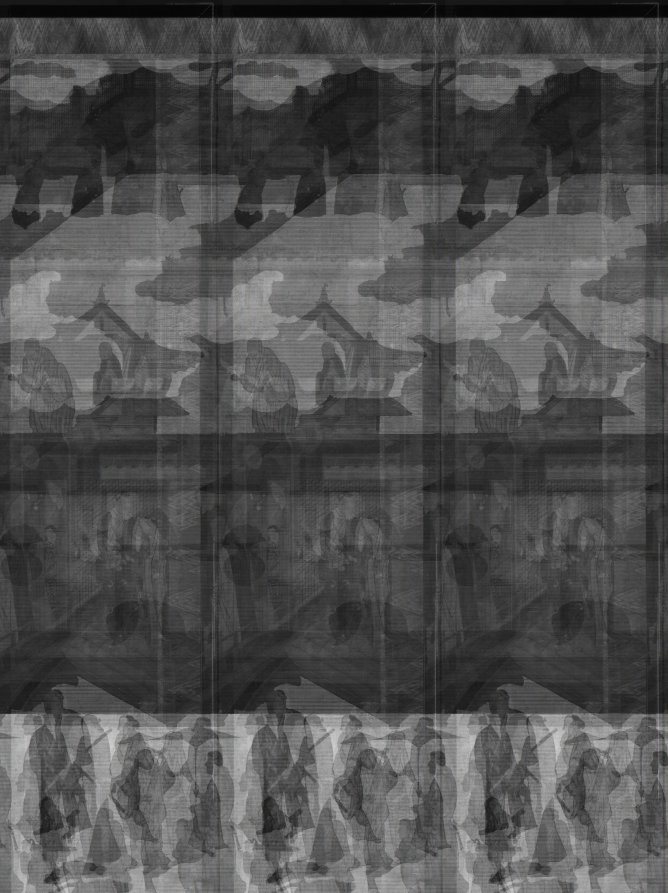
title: Arrival of the "Southern Barbarians"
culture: Japan, Momoyama period (1573–1615)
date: c. 1600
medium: One of a pair of six-panel folding screens; ink, color, and gold on paper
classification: Painting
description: This screen and its corresponding screen show Portuguese merchants arriving in Japan, having crossed the oceans in their large ship with a multinational crew. The Portuguese were known in Japan as the “Southern Barbarians” because they arrived from the south and their customs and manners were unfamiliar to the Japanese, who had not encountered anyone from Europe until their first appearance in 1543. In 1639, the Portuguese were forced out of Japan, mainly owing to internal difficulties caused by their Catholic missionaries, but they were a major conduit for both objects and ideas from Europe for nearly 100 years.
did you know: Europeans were called "Southern Barbarians" because their ships arrived in Japan from the south.